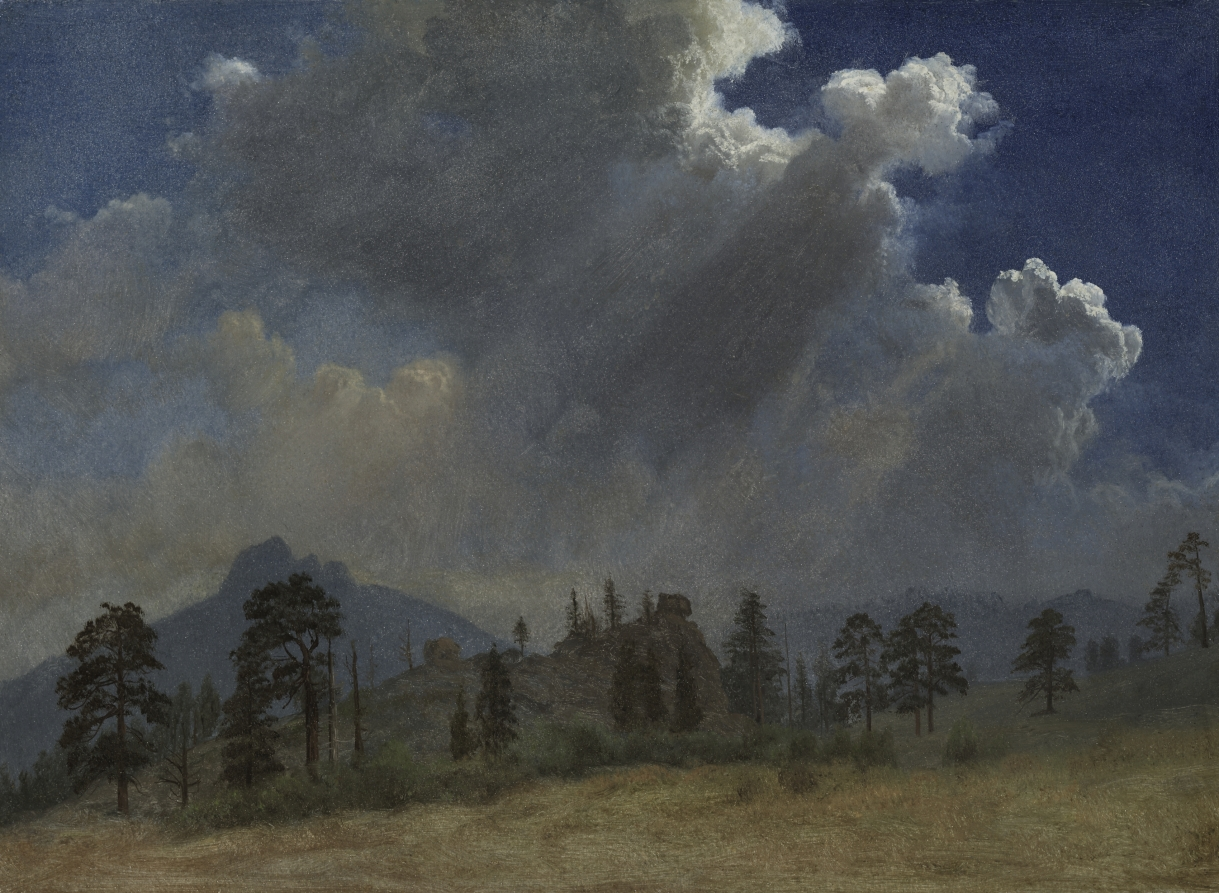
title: Fir Trees and Storm Clouds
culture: America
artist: Albert Bierstadt (American, born Prussia [now Germany], 1830–1902)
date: c. 1870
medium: oil on paper mounted on canvas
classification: Painting